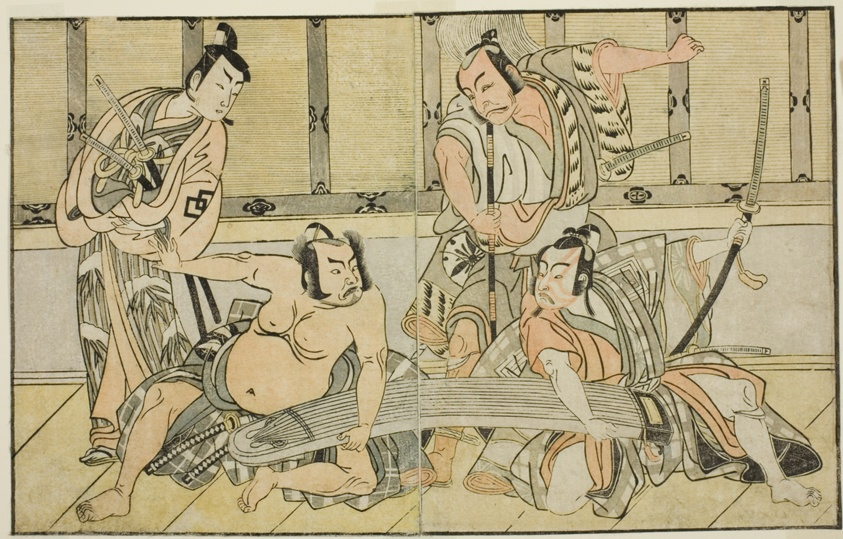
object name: Print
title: The Actors Ichikawa Yaozo II as Kujaku no Saburo, Matsumoto Koshiro II as Hata no Daizen Taketora, Nakajima Mihoemon II as Aramaki Mimishiro, and Nakamura Shocho I as Ki no Tsurayuki (right to left), in the Play Kuni no Hana Ono no Itsumoji, Performed at the Nakamura Theater in the Eleventh Month, 1771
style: Japanese (culture or style)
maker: Katsukawa Shunsho 勝川 春章; Japanese, 1726-1792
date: c. 1772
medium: Color woodblock print; from the illustrated book Yakusha Kuni no Hana (Prominent Actors of Japan)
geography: Japan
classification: woodblock print; print; asian art